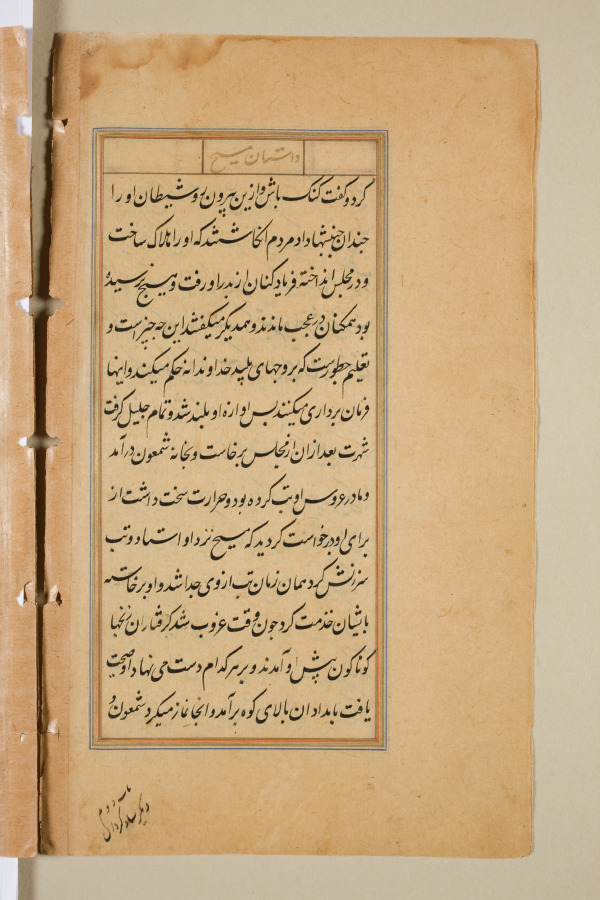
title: Text page from a Mirror of Holiness (Mir’at al-quds) of Father Jerome Xavier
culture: Mughal India, Allahabad, made for Prince Salim (1569–1627)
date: 1602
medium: Ink and gold on paper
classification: Manuscript